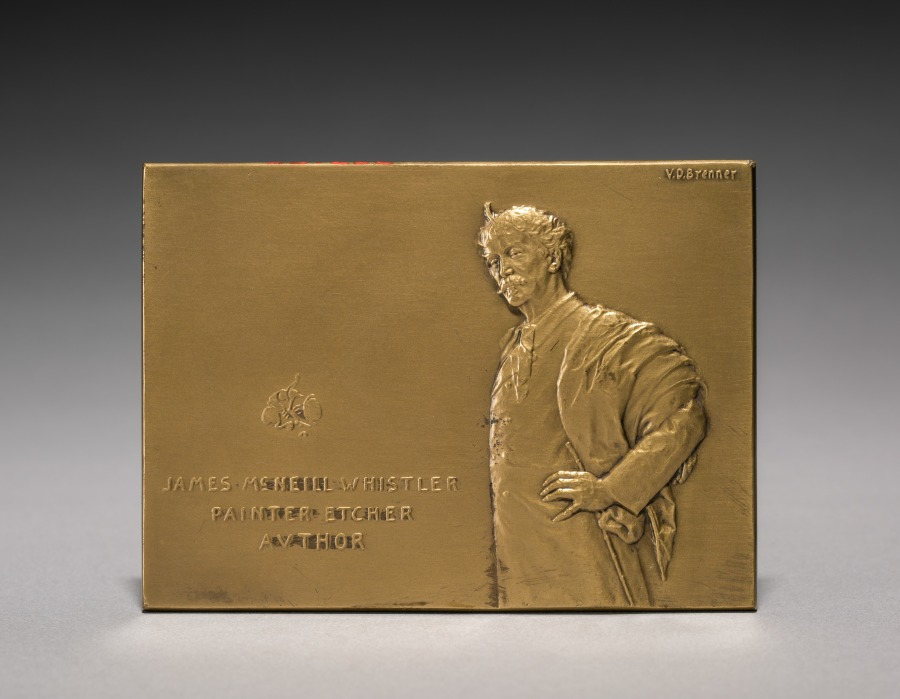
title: Whistler Medal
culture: America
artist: Victor D. Brenner (American, 1871–1924)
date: 1900s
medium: bronze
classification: Metalwork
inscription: obverse - Whistler's butterfly monogram and the inscription: "JAMES MCNEILL WHISTLER"/" PAINTER ETCHER"/" AVTHOR"; above, signed: "V. D. Brenner." reverse - "Messieurs les Ennemis."